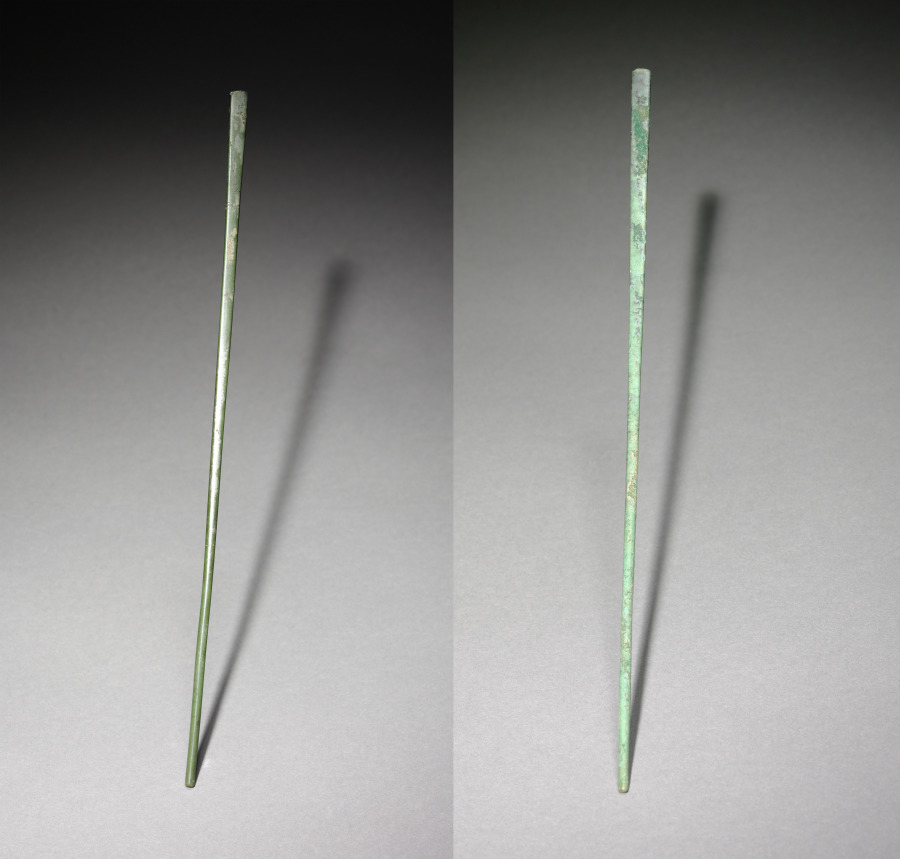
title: A Pair of Chopsticks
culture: Korea, Goryeo dynasty (918–1392)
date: 918–1392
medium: bronze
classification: Metalwork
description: In Korea, chopsticks made of metal such as brass, silver, and gold were excavated from ancient tombs and ruins dated to the 6th century at the earliest. Burial goods often include utilitarian objects such as table wares and utensils because the dead were believed to need them in the afterlife.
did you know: In contrast to the Chinese and Japanese, Koreans still prefer metal chopsticks (stainless steel and brass) to wooden ones.